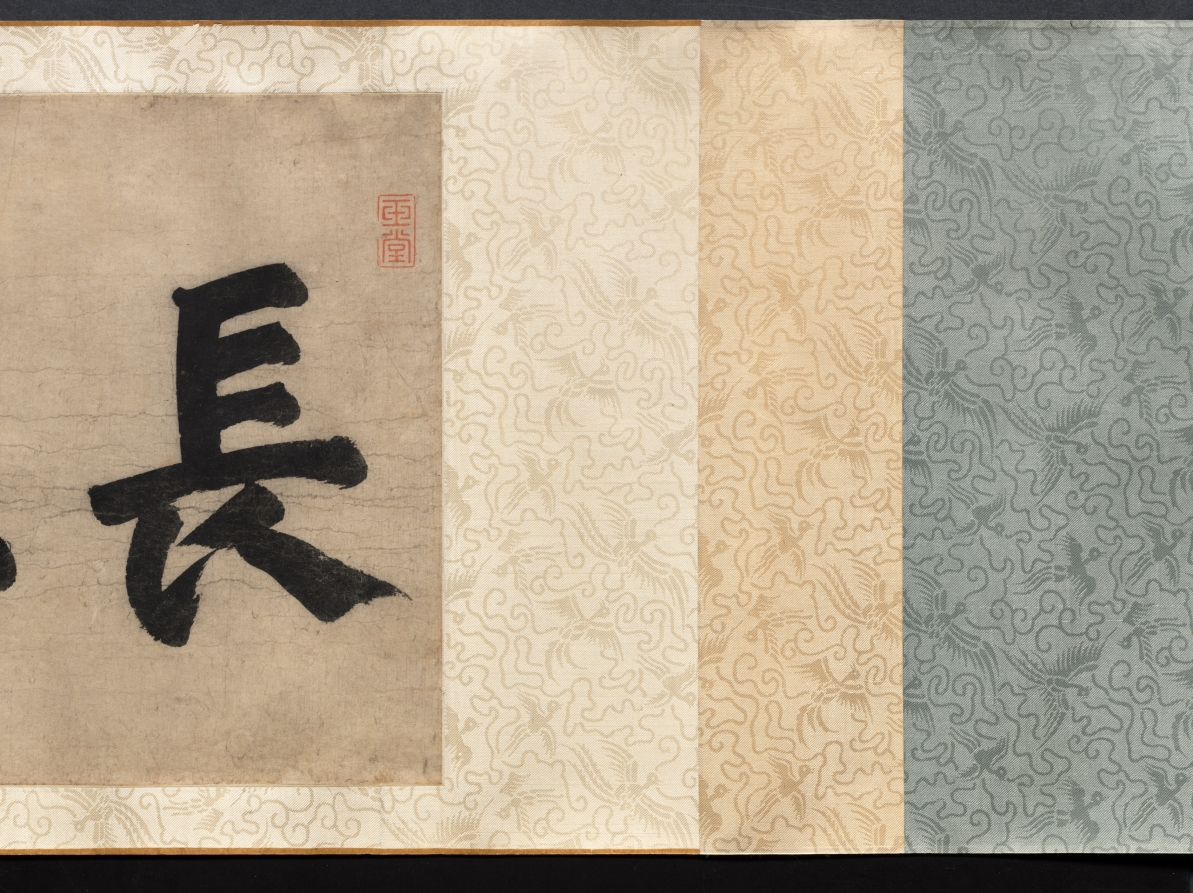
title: Ten Thousand Li of the Yangzi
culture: China, Ming dynasty (1368–1644)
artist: Dai Jin (Chinese, 1388–1462)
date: c. 1400s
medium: Handscroll; ink and color on paper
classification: Painting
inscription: Two colophons at end. Artist's seals: Dai Jin 戴進 and Wenjin 文進.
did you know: Dai Jin is traditionally considered the founder of the Zhe School, a style of landscape painting.